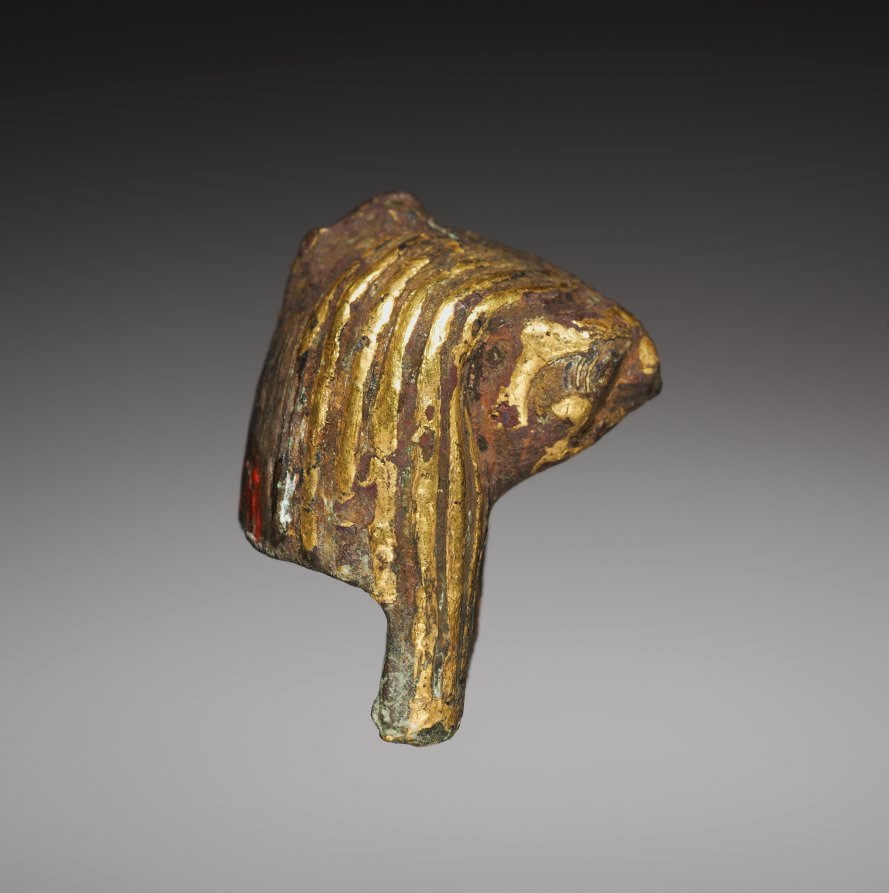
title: Falcon's Head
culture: Egypt, New Kingdom (1540–1069 BCE), Dynasties 18–19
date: 1350–1250 BCE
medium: face of bronze inlaid with gilt copper, wig of black copper (?) with copper striations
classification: Sculpture